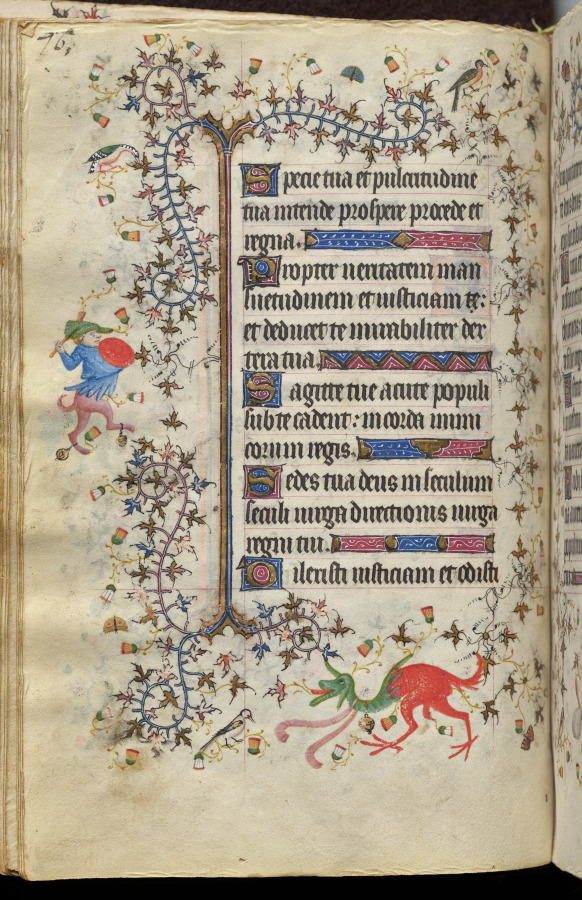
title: Hours of Charles the Noble, King of Navarre (1361-1425): fol. 38v, Text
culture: France, Paris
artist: Master of the Brussels Initials and Associates (French)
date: c. 1405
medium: ink, tempera, and gold on vellum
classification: Bound Volume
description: This precious book was highly prized by its owner, Charles III, King of Navarre, a French-born prince whose coat of arms is painted on 20 folios. Charles visited Paris on numerous occasions and likely acquired this volume there in 1404. Paris was the center of the European book trade at the time and attracted illuminators from many parts of Europe. This manuscript represents one of the most remarkable fusions of French and Italian taste in book illumination. Though conforming to Parisian standards, most of the book’s major miniatures are the work of the Brussels Initials Master, an Italian illuminator who previously worked in Bologna and Padua.